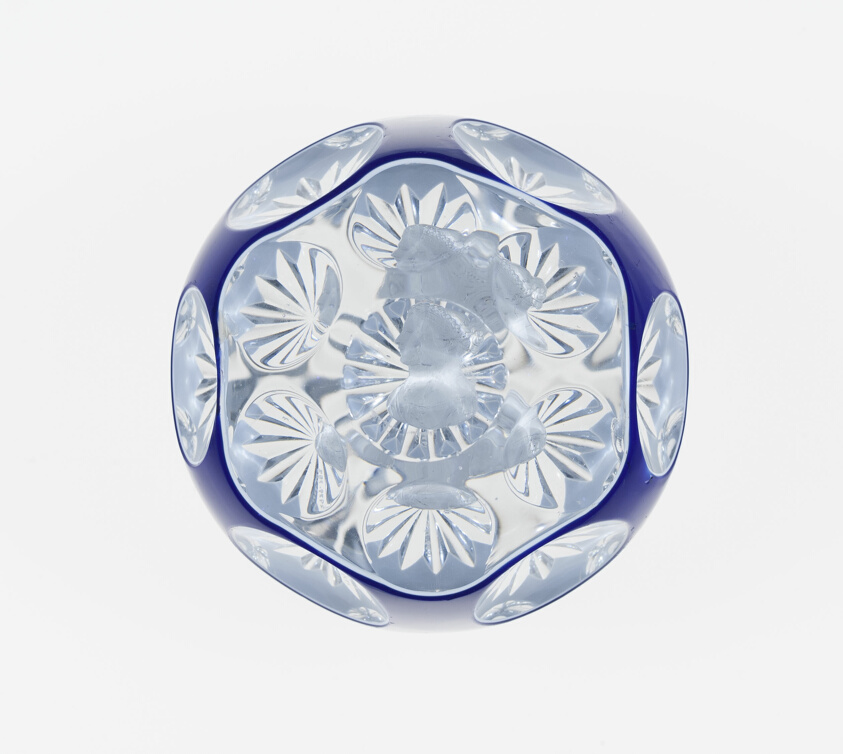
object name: Glass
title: Paperweight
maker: Saint-Louis Glassworks (Cristalleries de Saint-Louis); Lorraine, France, founded 1586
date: c. 1846–55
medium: Glass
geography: Saint-Louis-lès-Bitche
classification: paperweight; sulphide (glass); european decorative arts; glass